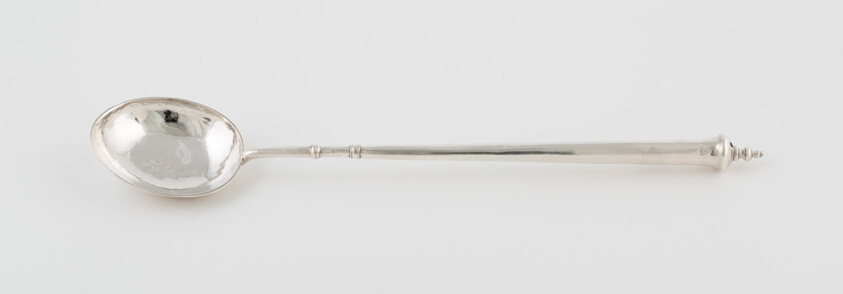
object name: Metalwork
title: Basting Spoon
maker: Thomas Cory; English; London, England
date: 1685/86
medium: Silver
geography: London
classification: silver; metalwork; european decorative arts